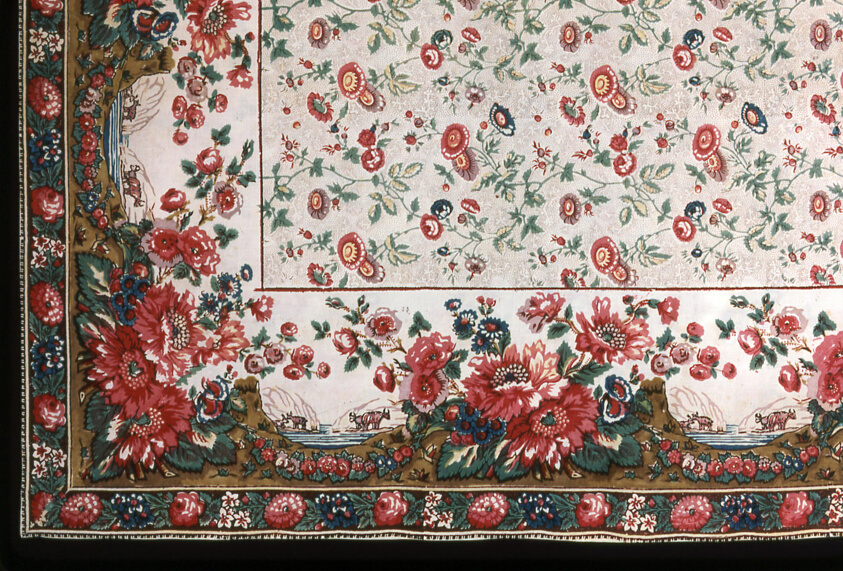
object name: Textile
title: Panel (Possibly a Shawl or bedspread?)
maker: England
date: 19th century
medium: Plain weave, block printed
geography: England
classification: textile; weaving - printed; weaving